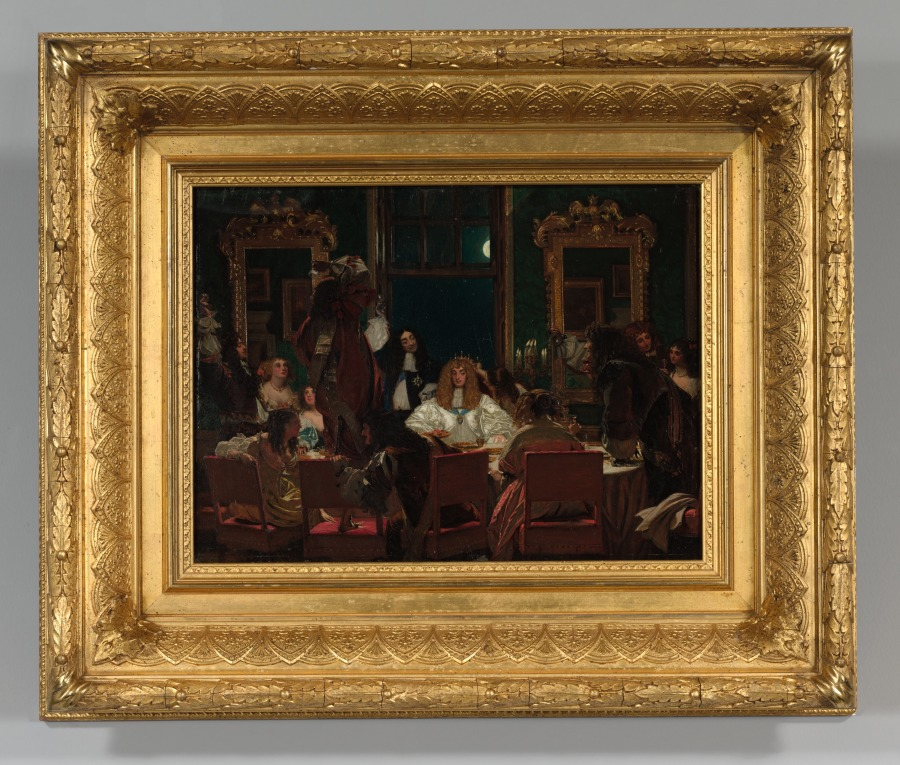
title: The Life of Buckingham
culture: England, 19th century, Victorian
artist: Augustus Leopold Egg (British, 1816-c. 1863)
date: c. 1855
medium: oil on board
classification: Painting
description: Augustus Leopold Egg’s The Life of Buckingham depicts a fictional moment in the debauched, roguish life of George Villiers (1628–1687), 2nd Duke of Buckingham (seated at the center, wearing white). Although the scene is invented, the merrymakers and courtesans depicted around the table (among them King Charles II, to Buckingham’s right) were characters the duke would have personally known and were familiar to Victorian audiences who delighted in the cautionary tale of excess.